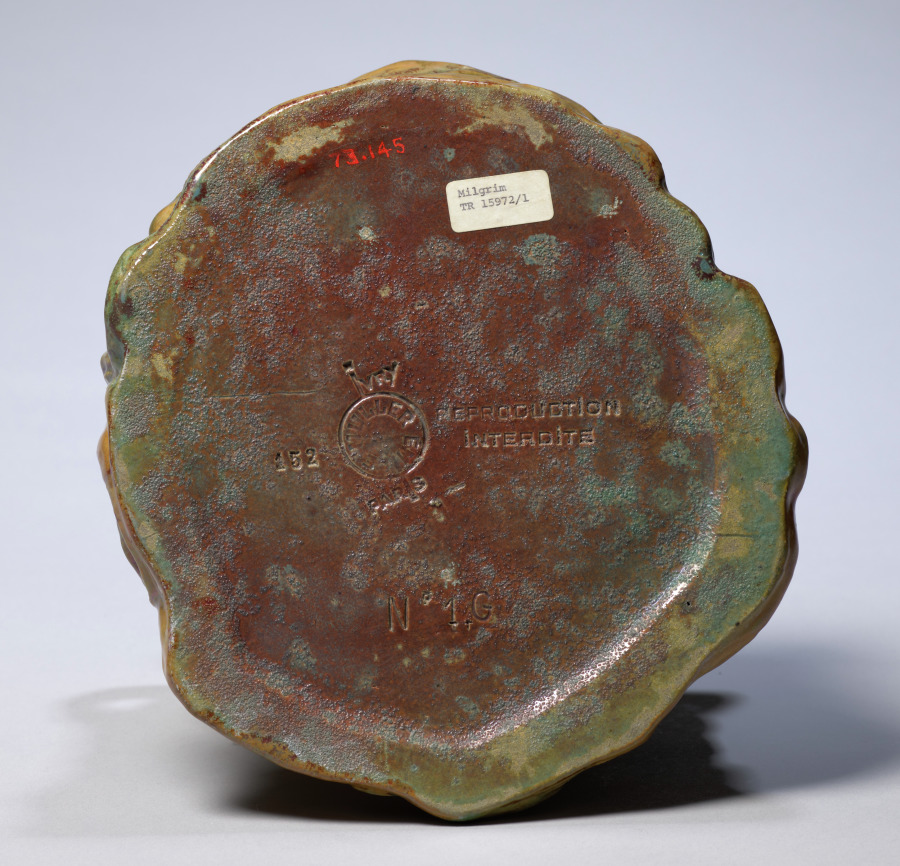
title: Vase in the Form of a Woman's Head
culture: France, late 19th Century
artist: Emile Muller (French, 1889)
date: c. 1895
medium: stoneware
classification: Ceramic